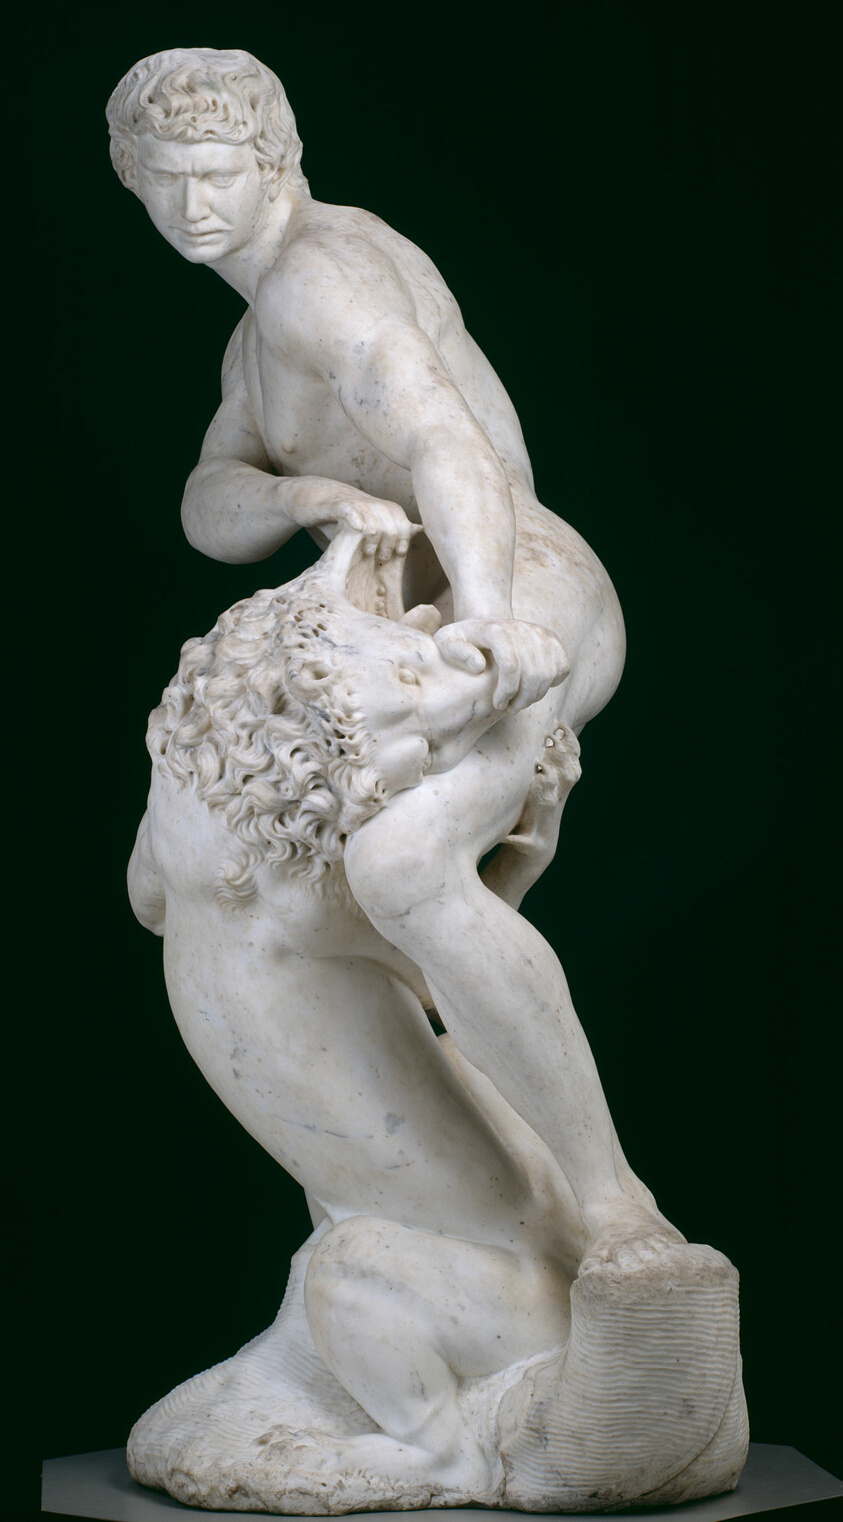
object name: Sculpture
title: Samson and the Lion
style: 17th Century, Baroque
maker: Cristoforo Stati (Italian, 1556–1619)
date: 1604–7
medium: Marble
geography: Italy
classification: large scale; sculpture; Italian; marble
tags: religious, Old Testament, religious scenes, nudes, man, figure, biblical, animals, lions, religious figures